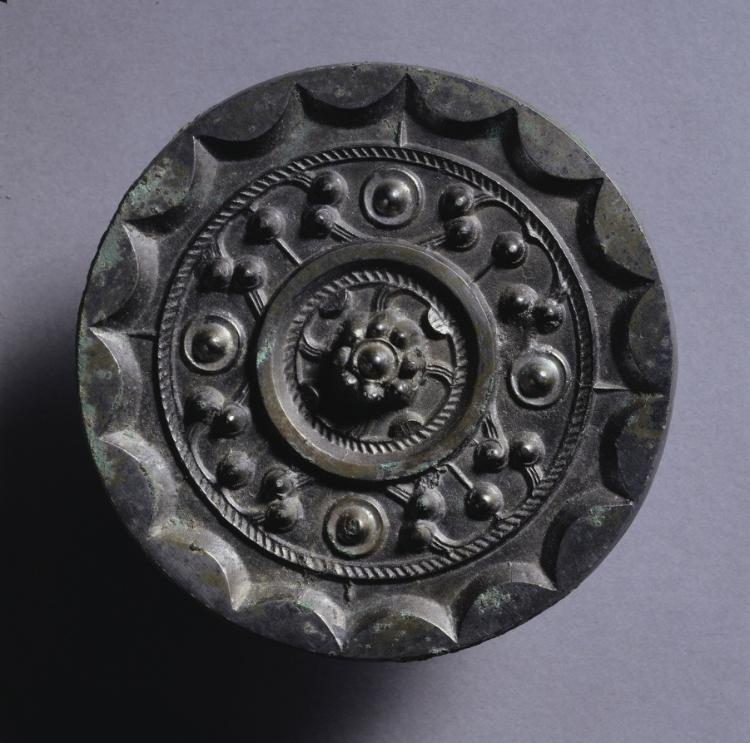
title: Mirror with Clouds and Nebulae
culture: China, Western Han dynasty (206 BCE–8 CE)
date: 200–100 BCE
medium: bronze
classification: Metalwork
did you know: Mirrors provided literal reflection and were decorated with symbolic imagery that illuminated universal themes.